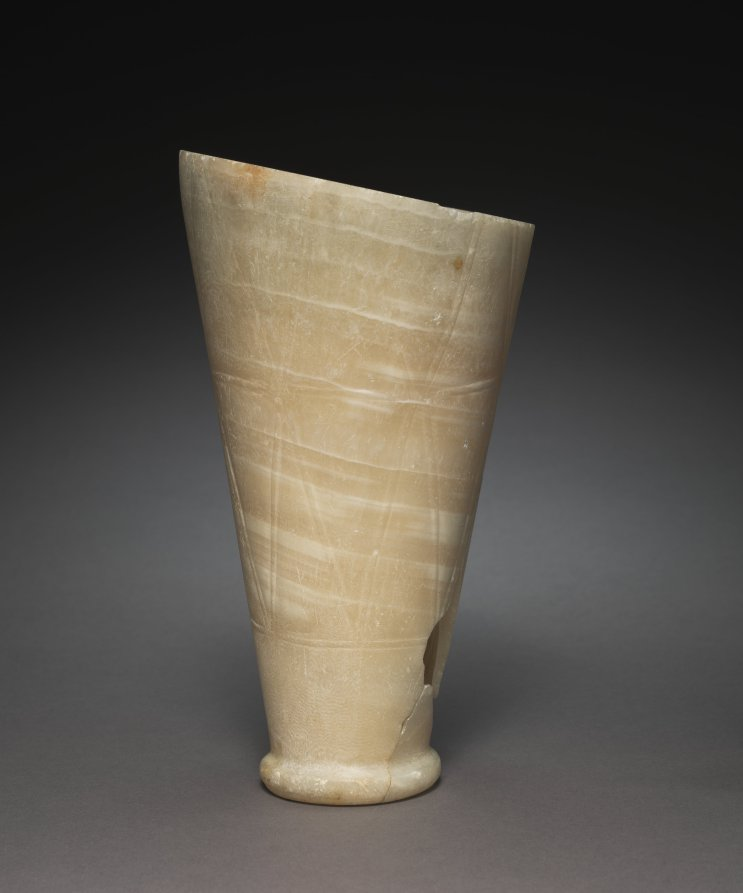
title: Tall Jar with Rope Patterns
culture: Egypt, Saqqara, north of the Step Pyramid, tomb 2305, excavations of J. E. Quibell, 1910-1911, Old Kingdom (2647–2124 BCE), Dynasty 3, reign of Djoser (c. 2650 BCE)–reign of Sneferu (2613–2589 BCE)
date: 2647–2454 BCE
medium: travertine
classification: Vessels